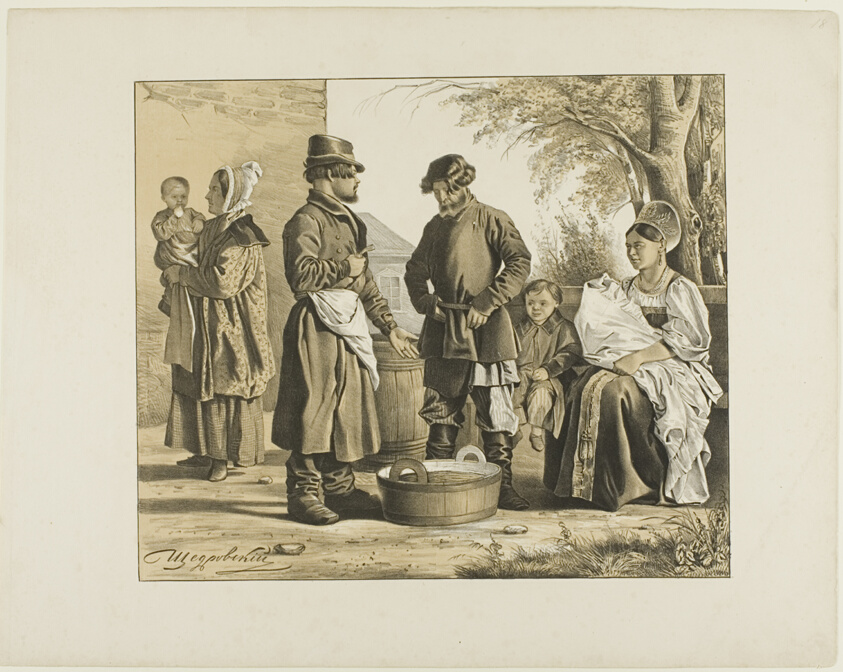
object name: Print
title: Scenes from Russian Folk Life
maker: Ignatii Stepanovich Shchedrovskii (Russian, 1815-1870)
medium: Color lithograph on paper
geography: Russia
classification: lithograph; print; prints and drawing